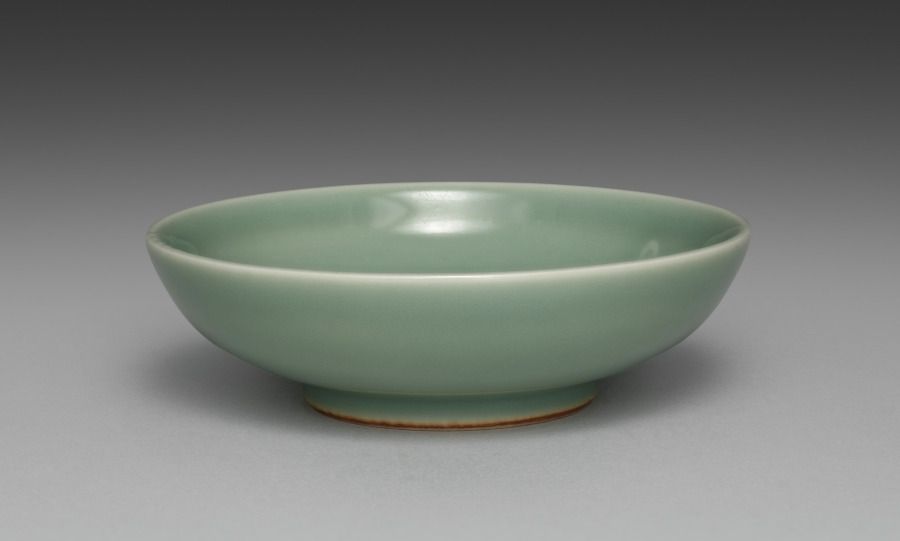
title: Dish from Dishes with Ivy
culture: Japan, Meiji period (1868–1912)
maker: Seifū Yohei III (Japanese, 1851–1914)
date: 1893–1914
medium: One from a set of five dishes; porcelain with green glaze and molded designs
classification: Ceramic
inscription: 清風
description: Yohei III’s main output for his sophisticated clientele was in the form of tea sets and dining sets. He often produced in pairs, sets of five, or sets of ten. This set of five dishes with a green glaze and designs of ivy vines in very low relief has unfortunately lost its box. These dishes are slightly larger than the other dishes, like CMA 2022.187, and so may have been not saucers but rather small plates for meals.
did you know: In his career, Seifū Yohei III created a range of dishes in green glazes.